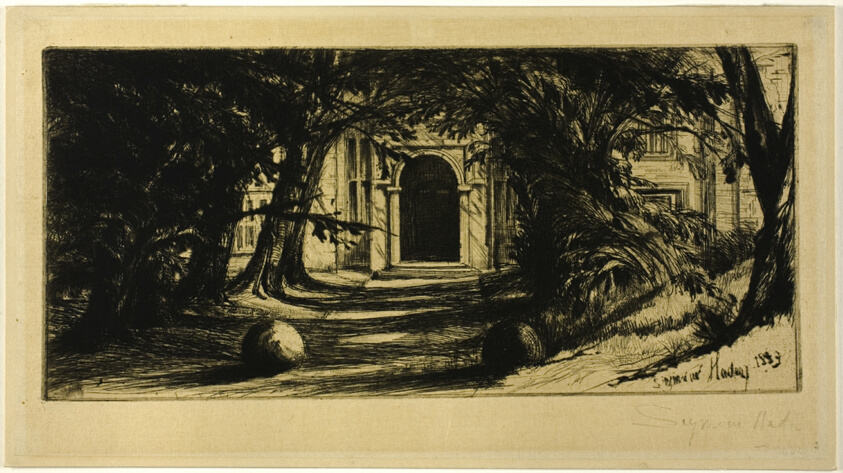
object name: Print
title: Mytton Hall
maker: Francis Seymour Haden (English, 1818-1910)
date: 1859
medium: Drypoint on cream wove paper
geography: England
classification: etching; print; prints and drawing